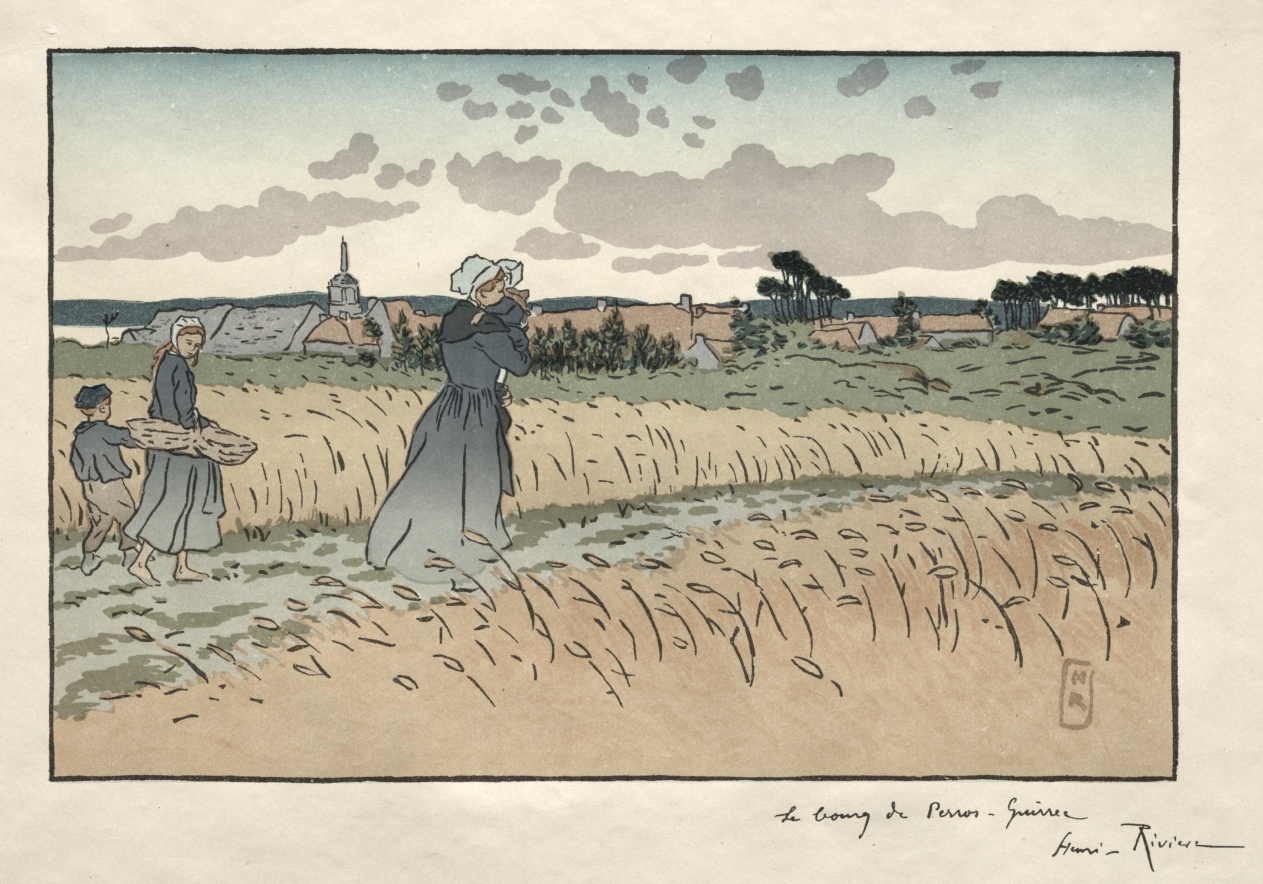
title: Parisian Landscapes: The Borough of Perros-Guirec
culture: France, 19th century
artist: Henri Rivière (French, 1864–1951)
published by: Verneau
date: 1896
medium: color lithograph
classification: Print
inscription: below image, in black ink: inscription and signature